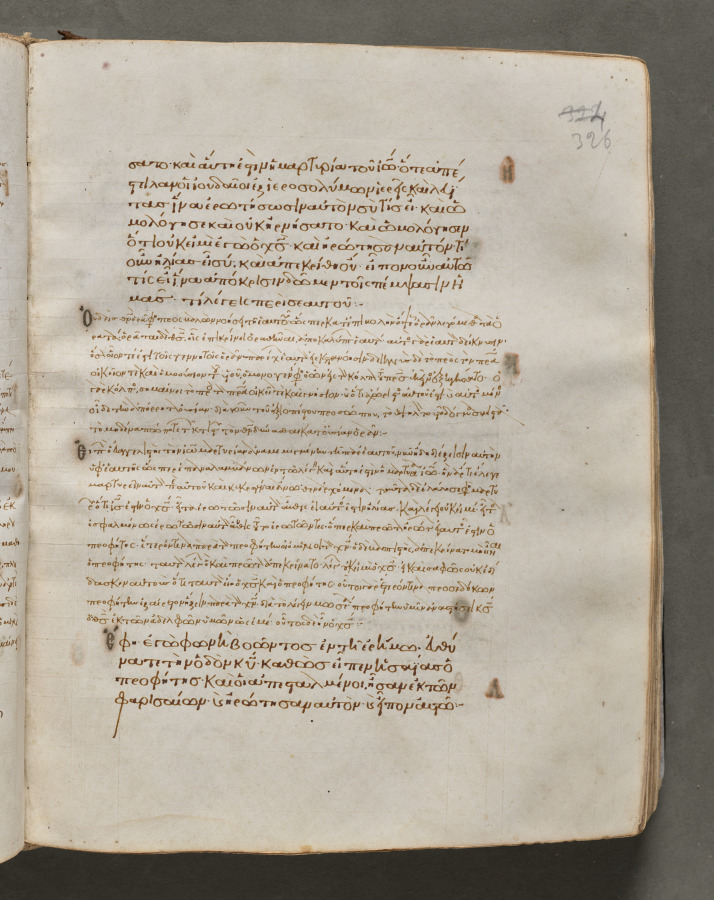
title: Text, folio 326 (recto), from a Gospel Book with Commentaries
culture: Byzantium, Constantinople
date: c. 1000–1100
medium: ink, tempera, and gold on vellum; leather binding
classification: Bound Volume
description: Each of the four gospels in this book opens on a page with brilliantly illuminated borders depicting the author of the text as well as birds—principally peacocks, symbols of the immortality of the soul—and fountains, representing the fountain of life and the salvation of the soul. This volume consists of 428 leaves with texts in Greek. Its level of sophistication suggests that it was probably written and decorated in a monastery in Constantinople.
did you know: Gospel books were carried in procession through Byzantine churches.